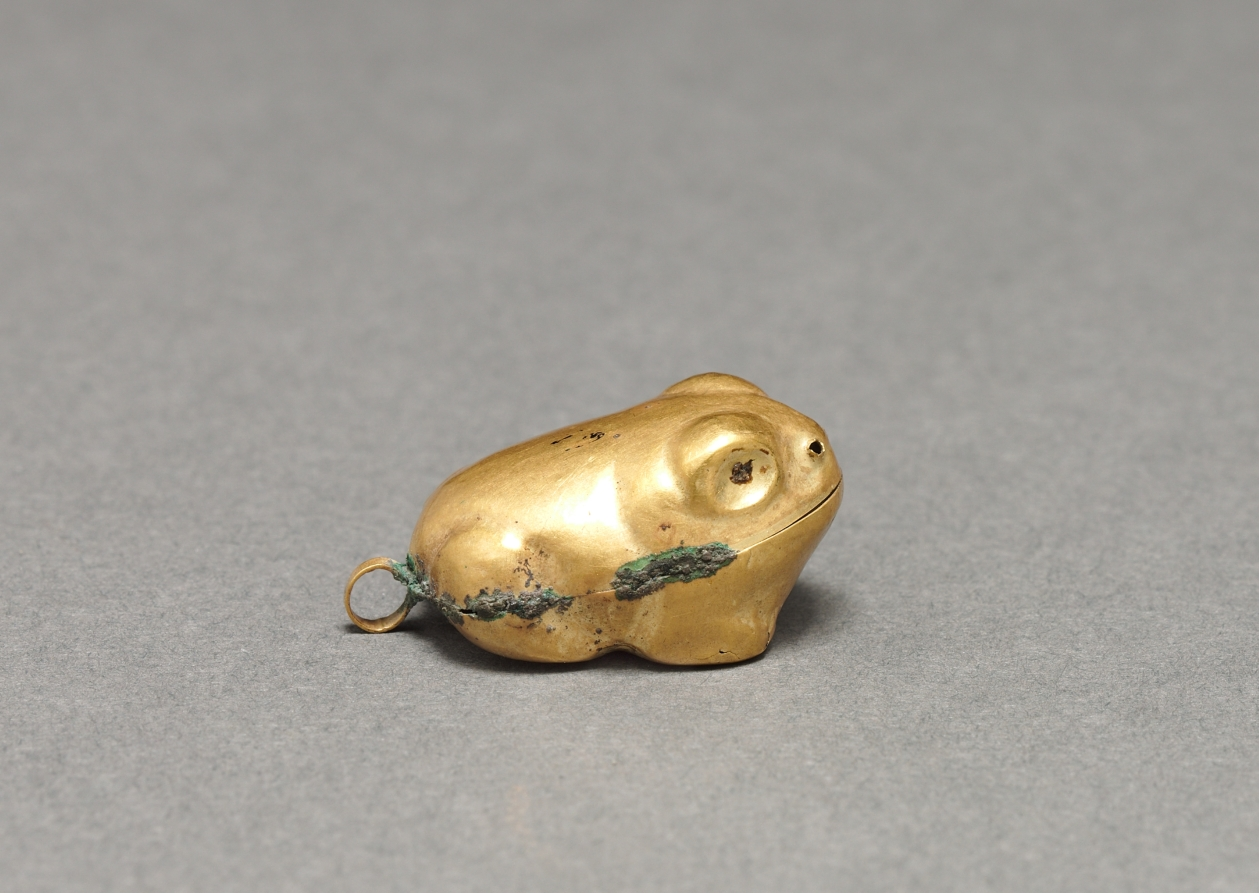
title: Frog Pendant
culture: Peru, Moche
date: 200–700 CE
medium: gold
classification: Metalwork